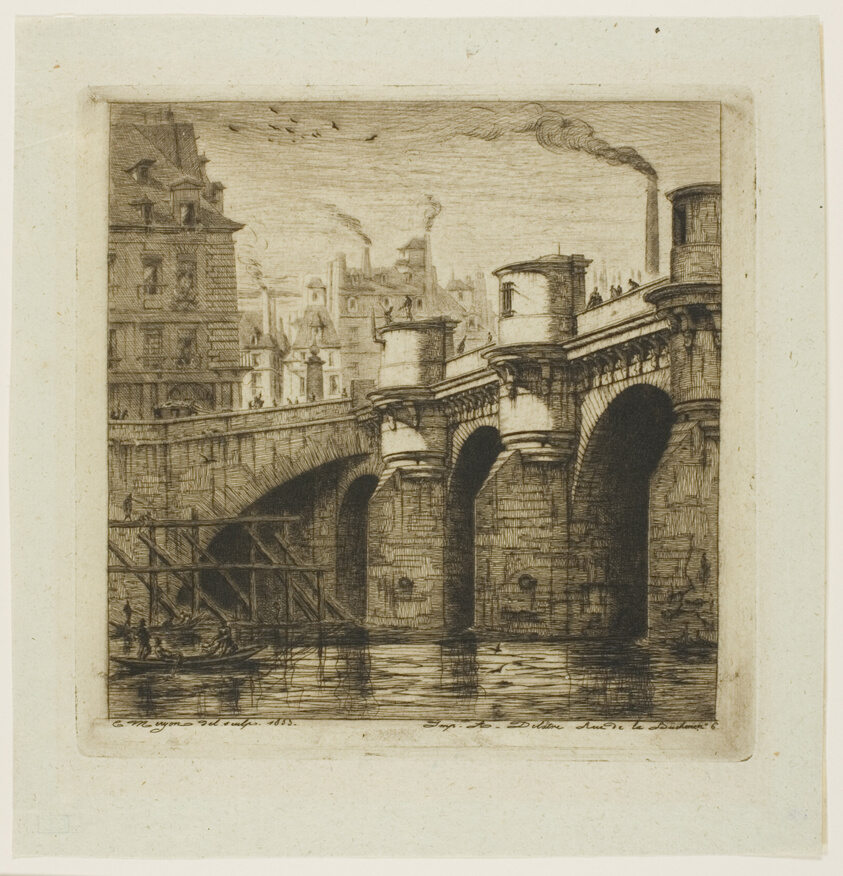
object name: Print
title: Pont-Neuf, Paris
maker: Charles Meryon (French, 1821-1868); printed by Auguste Delâtre (French, 1822-1907)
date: 1853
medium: Etching and drypoint in warm black on verdâtre (greenish) laid paper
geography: France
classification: etching; print; prints and drawing